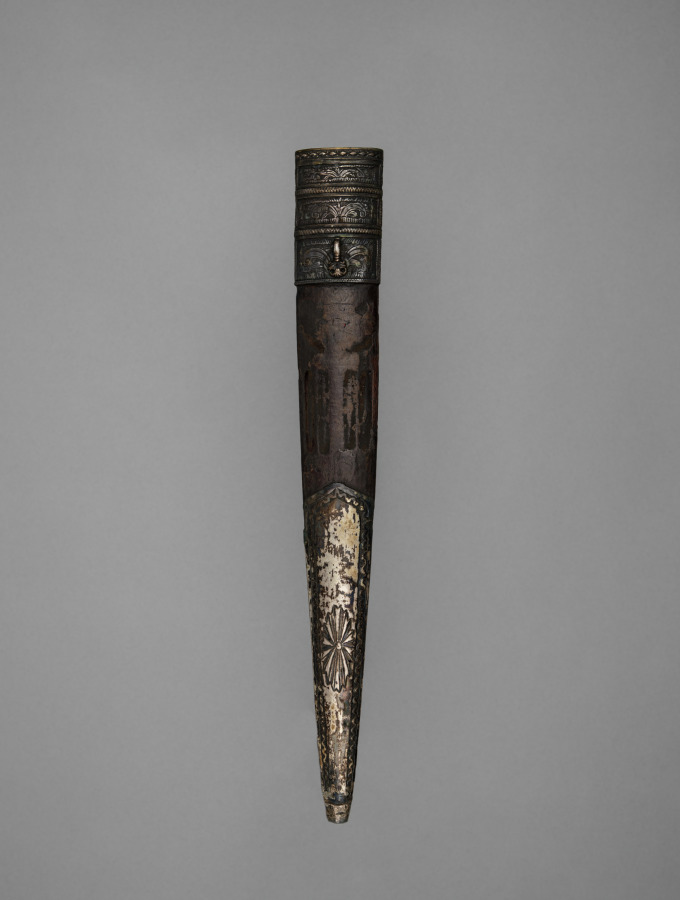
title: Scabbard for a Dagger (Khanjali)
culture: Transcaucasian, Georgian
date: 1700s–1800s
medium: copper alloy and silver gilt, textile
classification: Arms and Armor